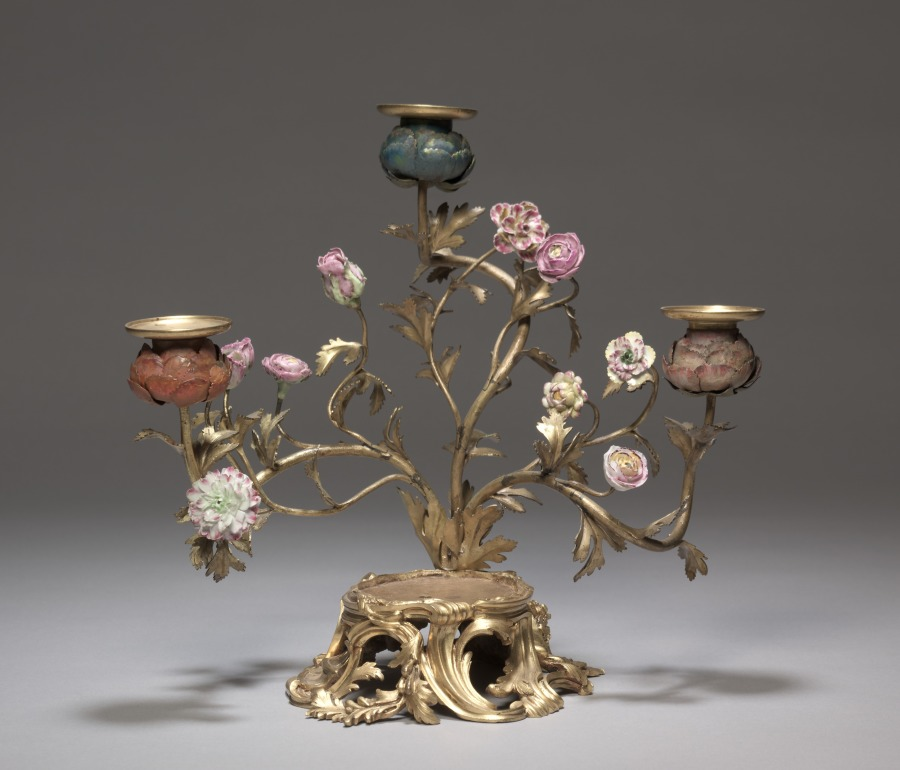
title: Candelabrum with Parrot (Candelabrum)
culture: France, style of Louis XV, 18th century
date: c. 1750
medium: gilt bronze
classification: Furniture and woodwork